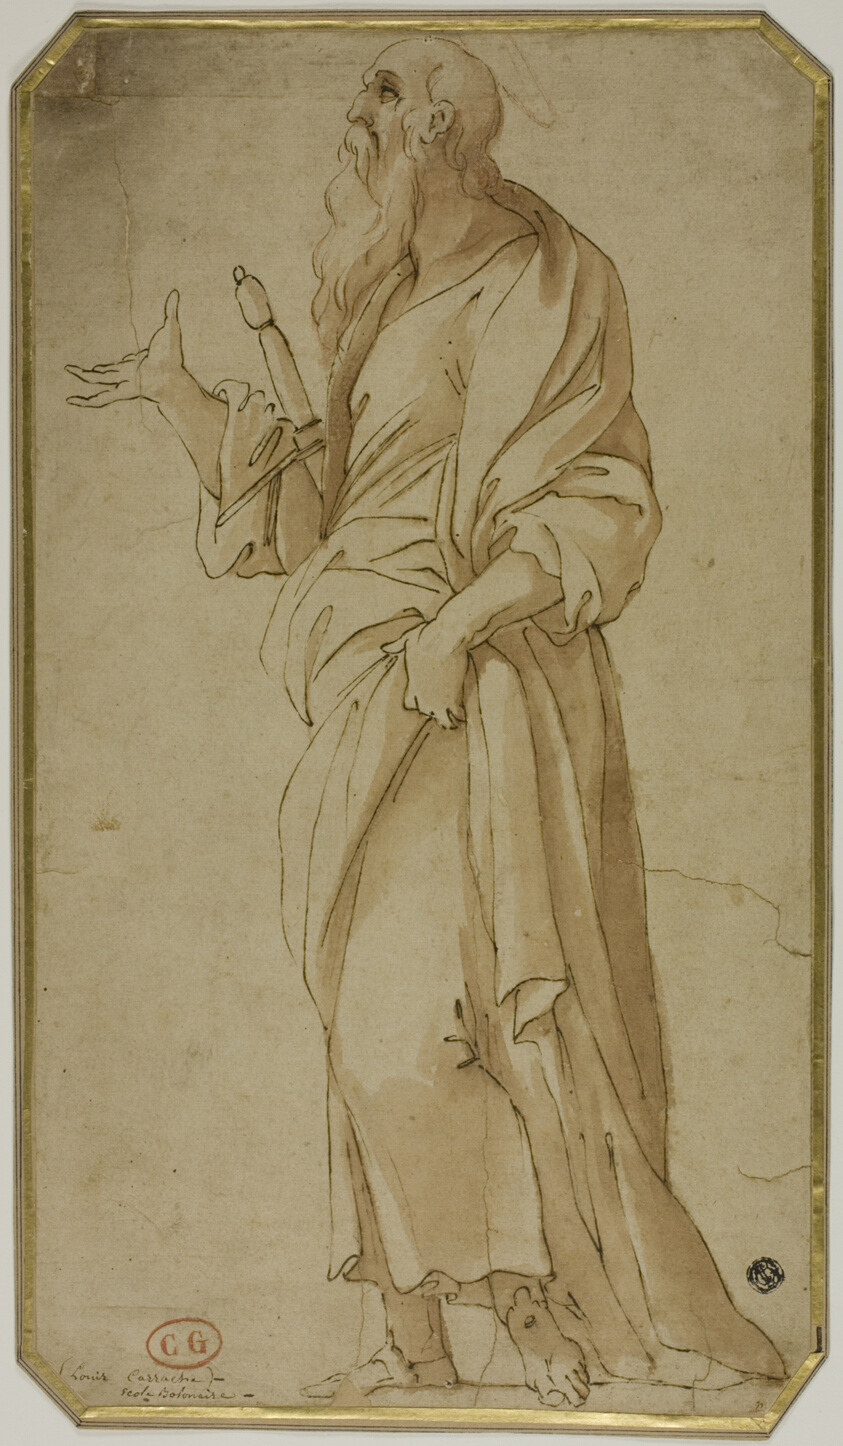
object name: Drawing and Watercolor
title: Saint Paul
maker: Circle of Giovanni Battista Trotti called Il Malosso; Italian, 1555-1619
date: 1590/1610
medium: Pen and brown ink with brush and brown wash, over traces of red chalk, on tan laid paper, laid down on tan wove paper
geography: Italy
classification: ink with wash; drawings (visual works); prints and drawing